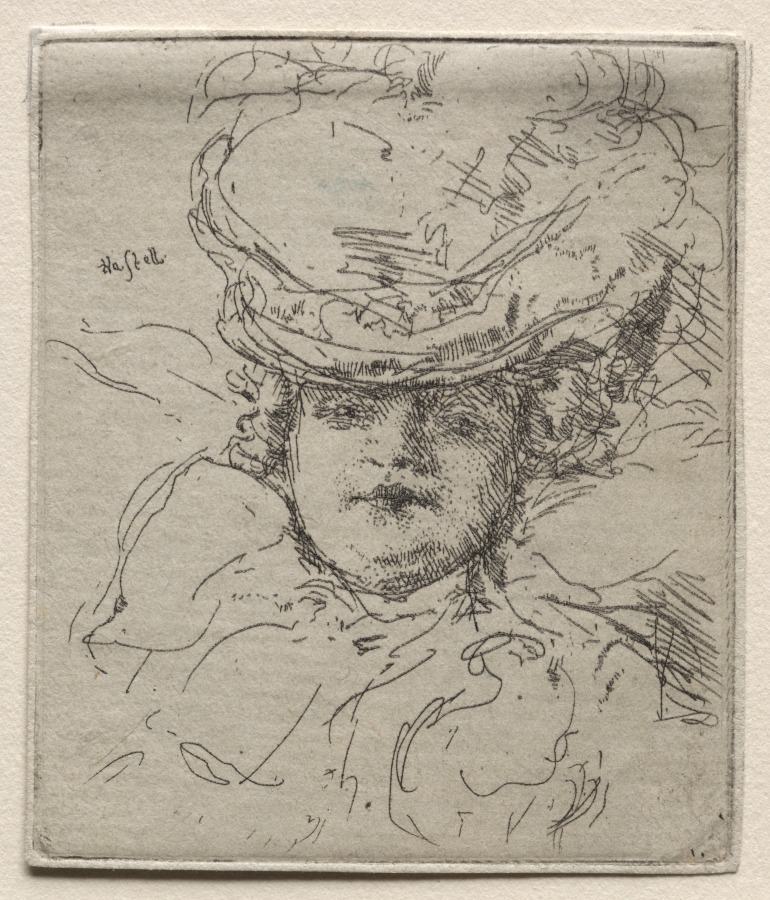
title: Paris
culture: America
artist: Ernest Haskell (American, 1876–1925)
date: 1910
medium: etching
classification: Print